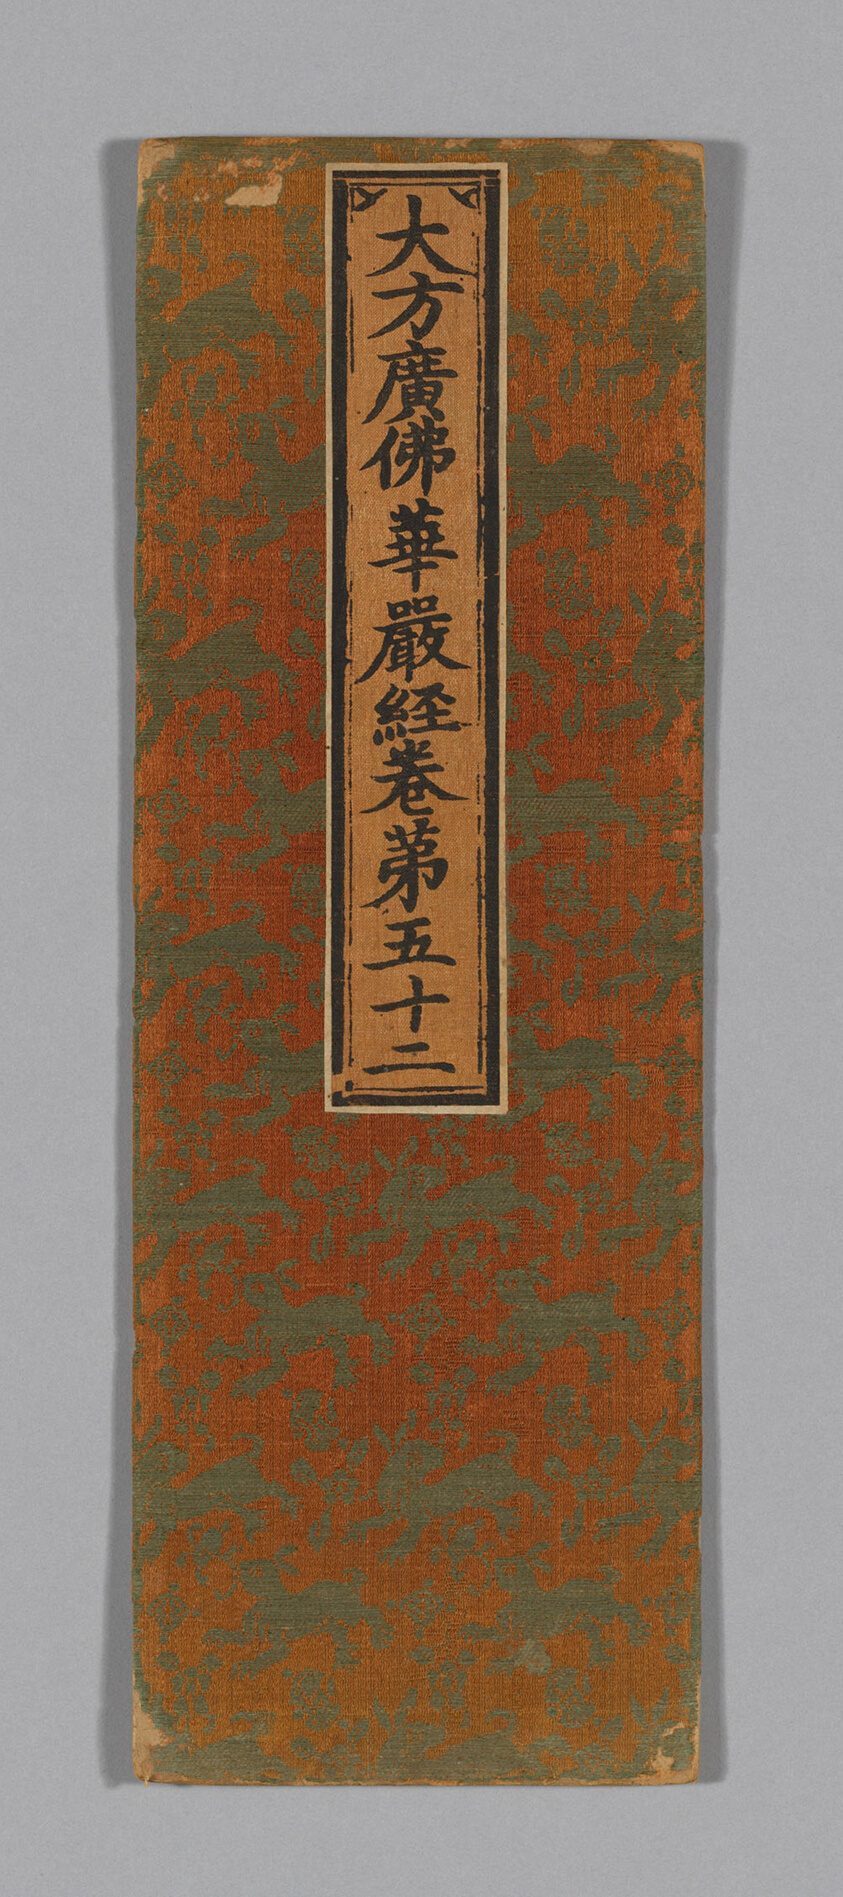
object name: Textile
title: Sutra Cover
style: ming, Chinese (culture or style), East Asian, asian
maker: China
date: Ming dynasty (1368–1644), c. 1590's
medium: Silk, warp-float faced 4:1 satin weave self-patterned by areas of weft-float faced 1:4 'Z' twill weave; label: silk, plain weave; painted with ink; over paper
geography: China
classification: textile; weaving